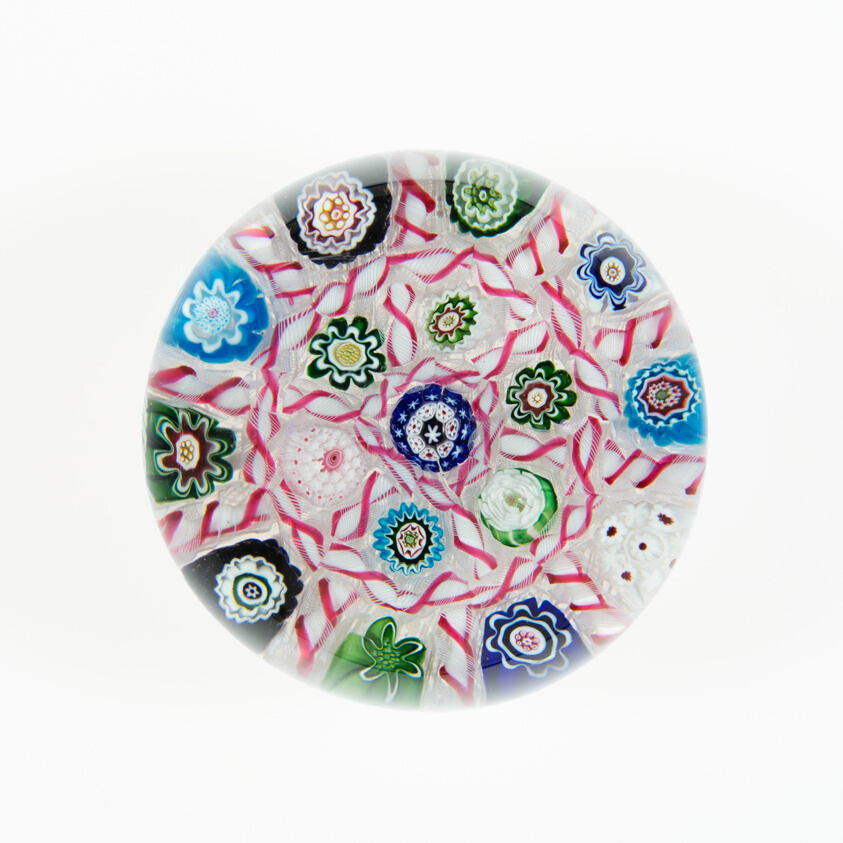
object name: Glass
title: Paperweight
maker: Clichy Glassworks (Cristalleries de Clichy); Clichy, France, 1837-1885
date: 19th century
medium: Glass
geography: Clichy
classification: paperweight; millefiori; european decorative arts; glass